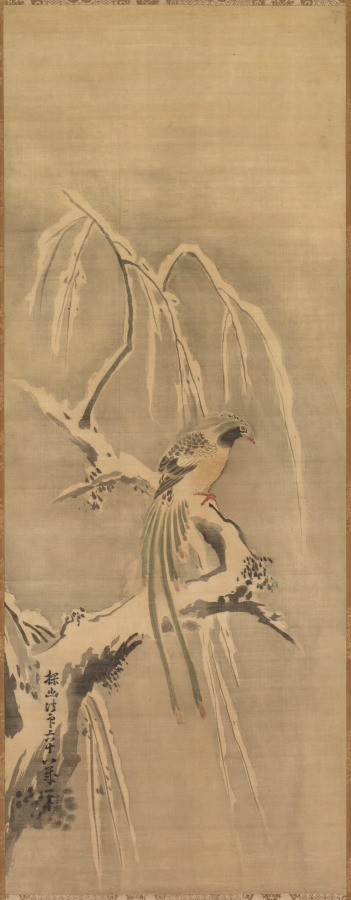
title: Chinese Bird on Snow-Laden Branch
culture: Japan, Edo period (1615–1868)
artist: Kano Tan’yū (Japanese, 1602–1674)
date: 1661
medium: One of a triptych of hanging scrolls; ink and slight color on silk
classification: Painting